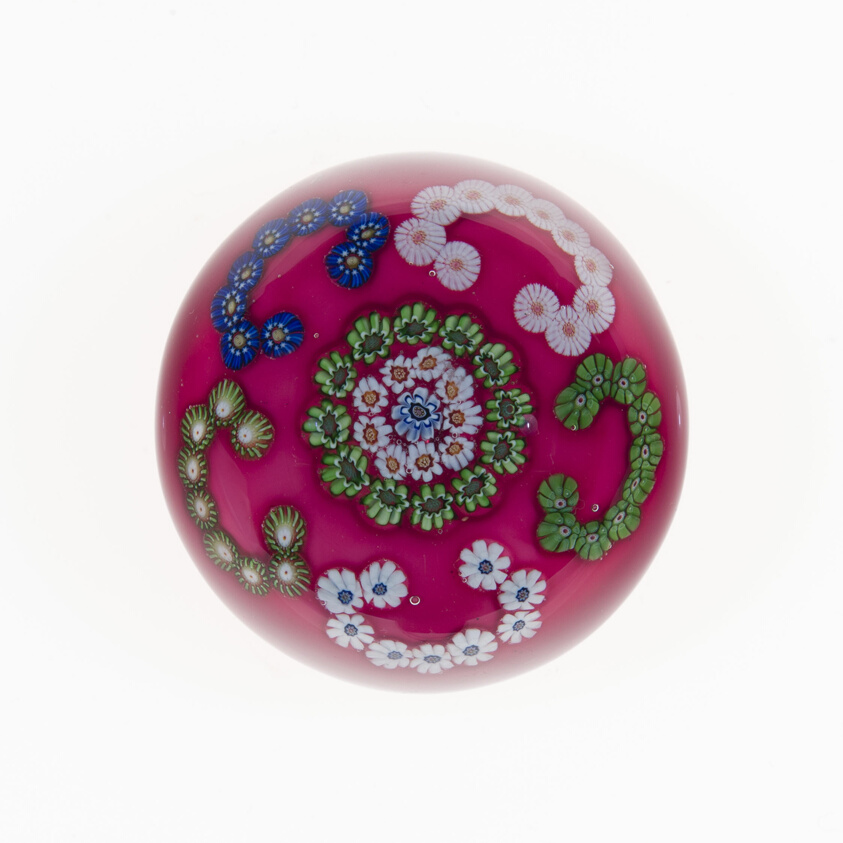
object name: Glass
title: Paperweight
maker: Clichy Glassworks (Cristalleries de Clichy); Clichy, France, 1837-1885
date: c. 1845/60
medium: Glass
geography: France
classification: paperweight; glass